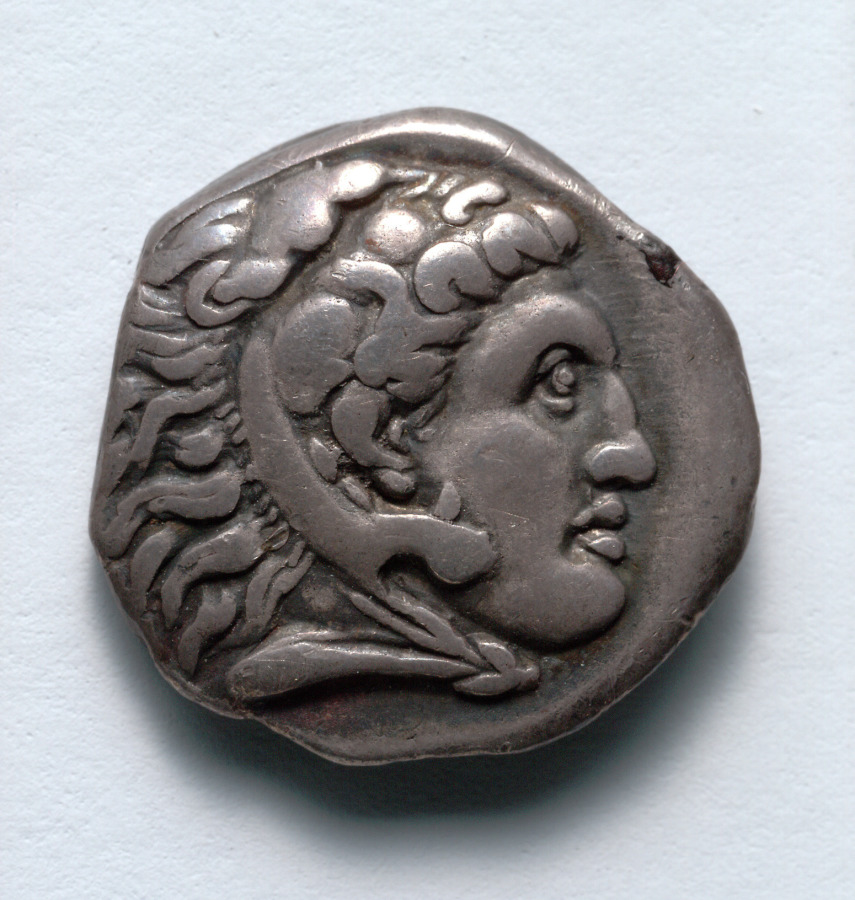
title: Drachm: Head of Herakles (obverse)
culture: Greek, minted at Erythrai (Ionia)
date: 387–300 BCE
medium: silver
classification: Coins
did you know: The hero Herakles appears on coinage from city-states across the Greek world.